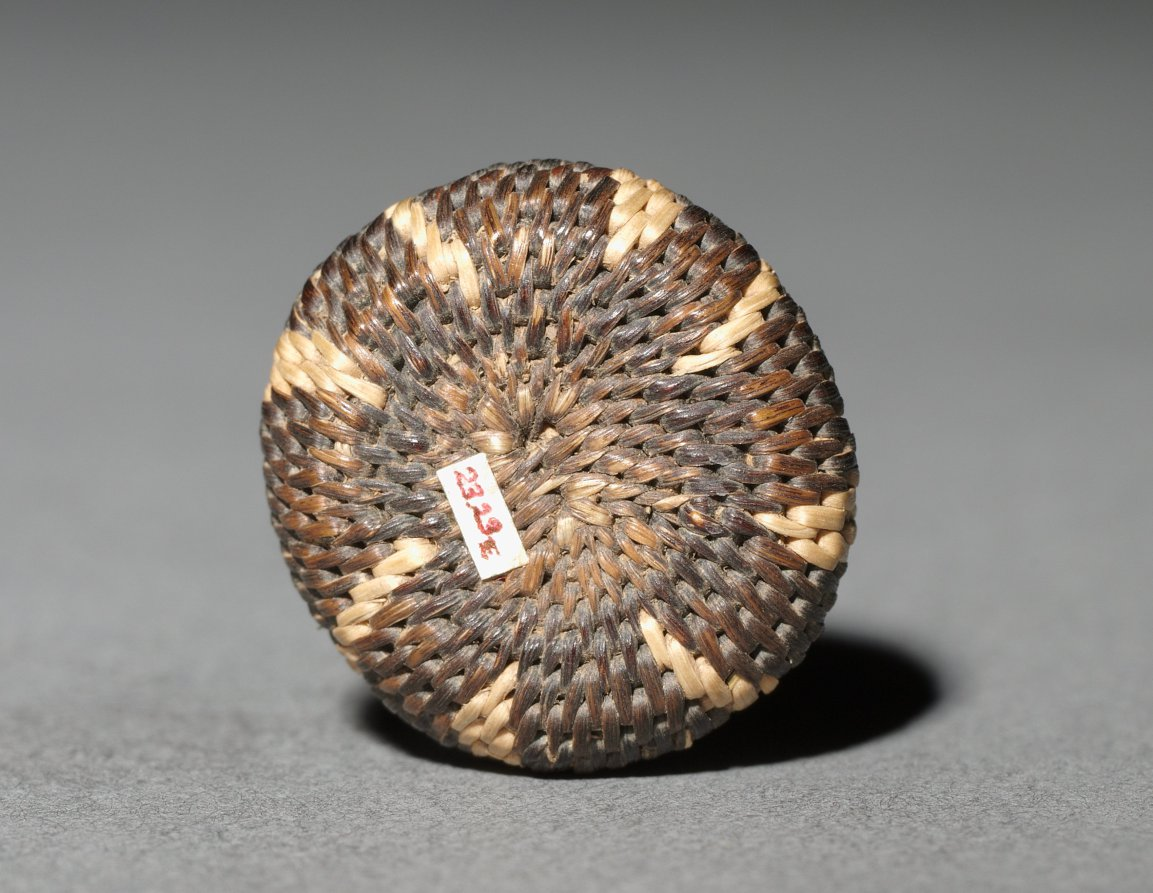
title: Miniature Basket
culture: America, Native North American, Southwest, Arizona, Akimel O'odham (Pima), Unassigned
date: before 1923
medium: plant fiber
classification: Basketry